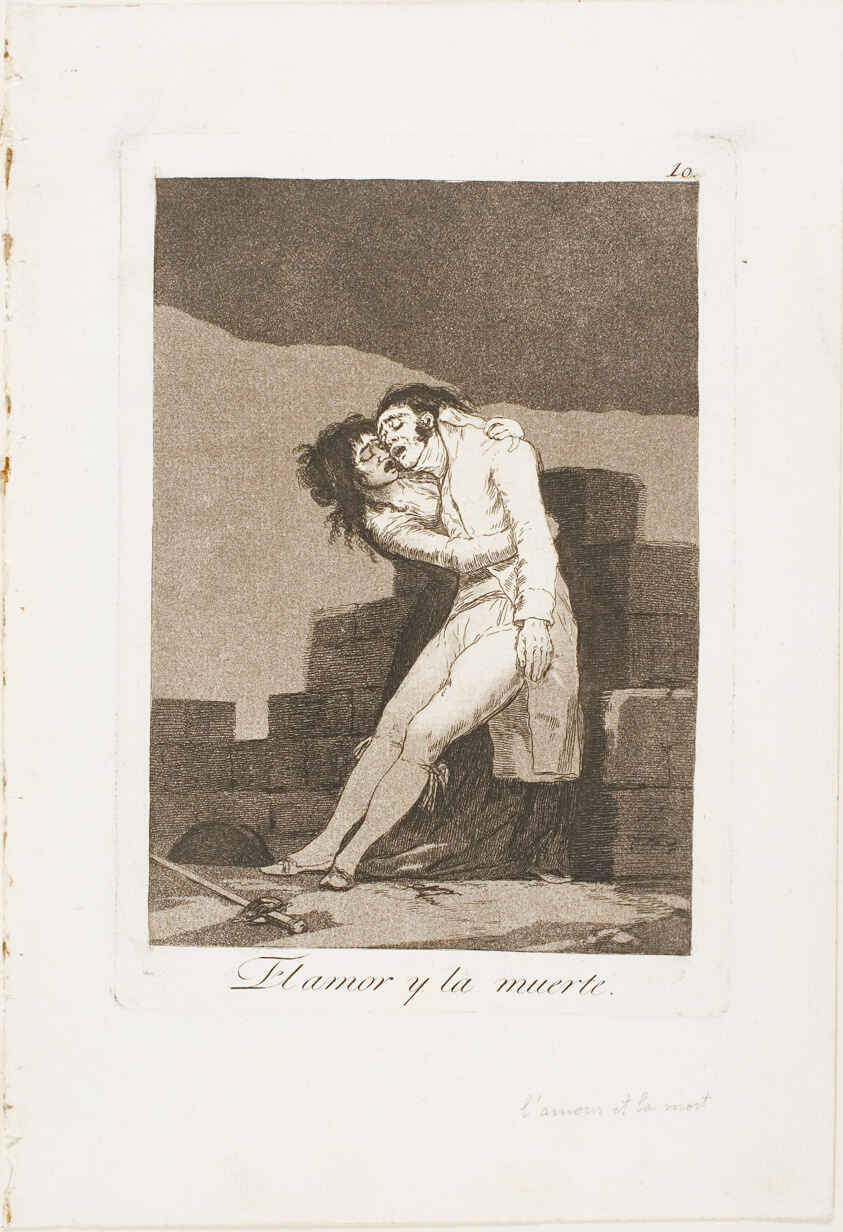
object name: Print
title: Love and Death, plate ten from Los Caprichos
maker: Francisco José de Goya y Lucientes (Spanish, 1746-1828)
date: 1797/99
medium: Etching and aquatint on ivory laid paper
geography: Spain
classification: etching; print; prints and drawing